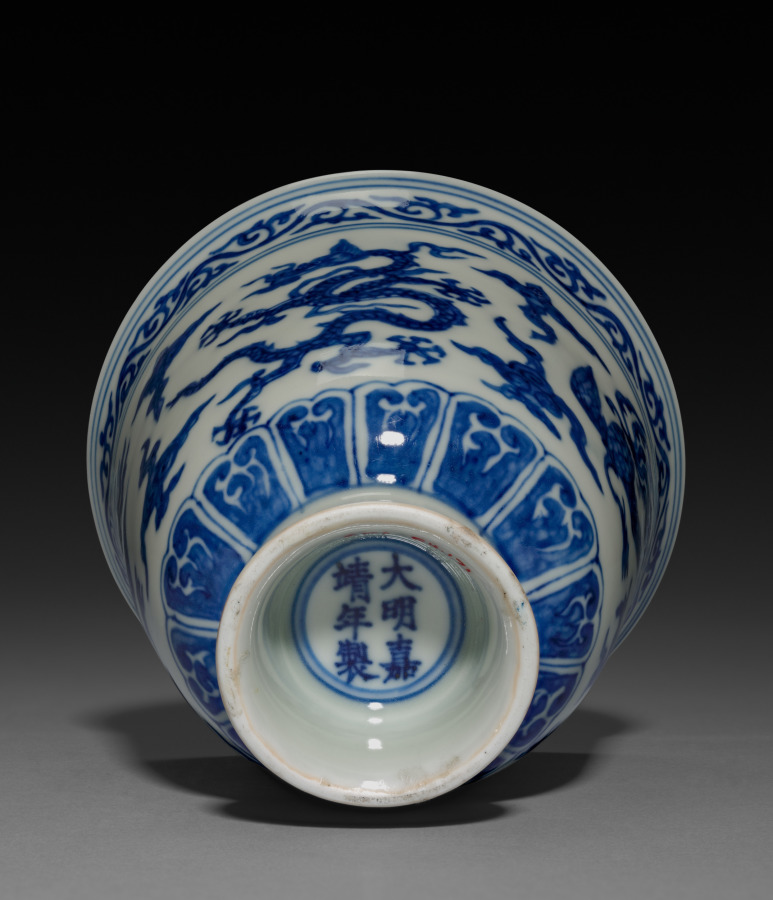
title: Cup with Dragons and Phoenixes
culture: China, Jiangxi province, Jingdezhen kilns, Ming dynasty (1368-1644), Jiajing mark and reign (1522-66)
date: 1522–66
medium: porcelain with underglaze blue decoration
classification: Ceramic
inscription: 大明嘉靖年製